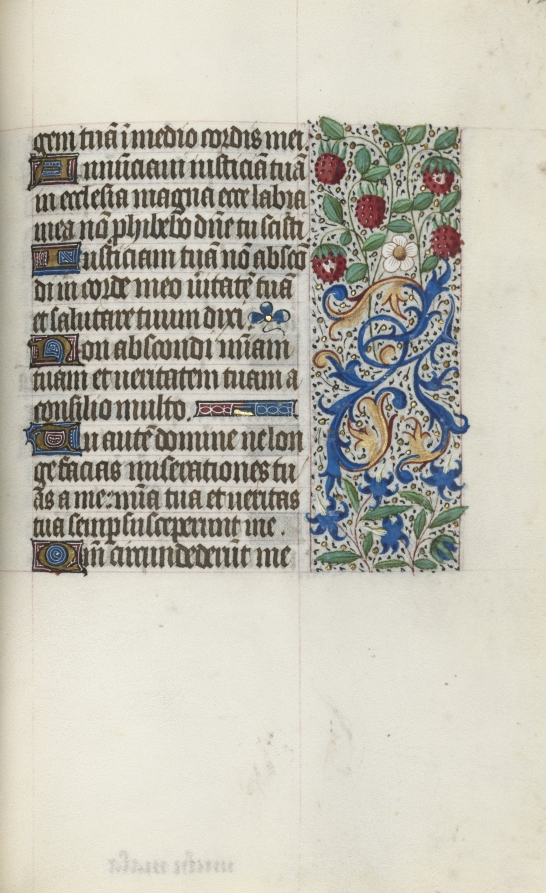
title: Book of Hours (Use of Rouen): fol. 126r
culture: France, Rouen, 15th century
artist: Master of the Geneva Latini (French, active Rouen, 1460–80)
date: c. 1470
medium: ink, tempera, and gold on vellum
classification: Bound Volume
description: In the late 1400s and early 1500s Rouen was an established and important center of book production. The city’s cathedral had a wealthy chapter that spent large sums of money to commission books and to maintain its extensive library. The stationers and booksellers would have likely been concentrated in or near the cathedral precinct. This artist, named after a manuscript now in Geneva, was Rouen’s principal illuminator during the second half of the 1400s.